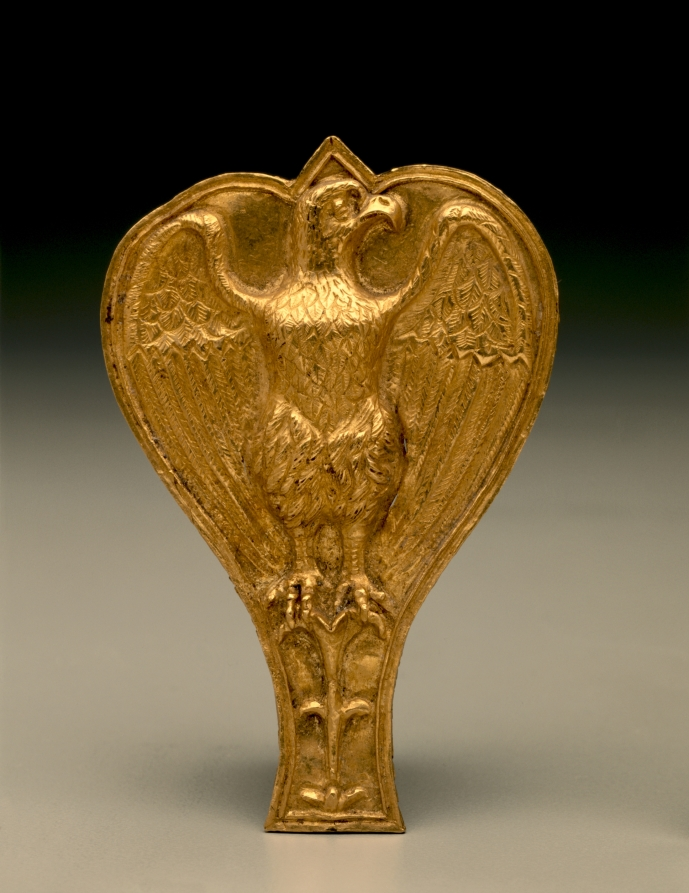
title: Ornament with Eagle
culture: Italy, Roman, Imperial Roman period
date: 1–300 CE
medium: gold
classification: Metalwork